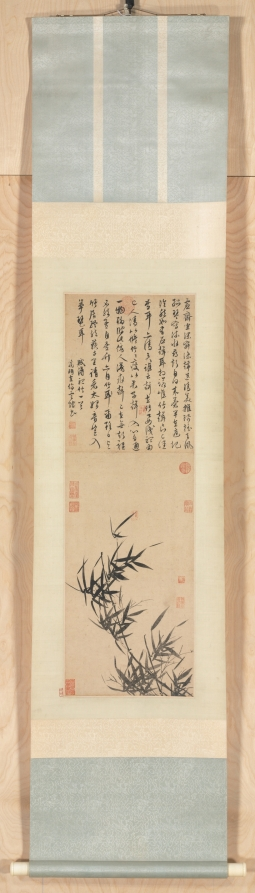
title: Listening to the Bamboo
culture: China, Ming dynasty (1368–1644)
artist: imitator of Wen Zhengming (Chinese, 1470–1559)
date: late 1400s-1500s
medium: hanging scroll, ink on sutra paper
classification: Painting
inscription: Artist's inscription, signature, and 2 seals on the separate sheet of paper above the painting: In the empty studio sitting in deep loneliness;/ Like cool sound sending pure beauty,/ Or pendants swinging in the wind,/ Or a solitary qin suggesting running water./ Where is that sound from?/ The green poles in the courtyard,/ Clear and light like an echo,/ The sound and ears are in tune./ The sound of bamboo now very beautiful;/ My ears are also clear./ Who says the sound is in the bamboo?/ To know it depends on oneself./ A noble person is like a tall bamboo;/ A thin bamboo is like the noble man./ When the sound enters, the mind responds,/ Only one thing but artificially separated./ A bystander searching for the sound,/ But the sound can only be found in silence./ Otherwise I am still I,/ Bamboo is still bamboo./ Even if I live with bamboo every day,/ Still the music will be a thousand miles away./ Look at sound's most primeval source:/ Did it enter a zither or a lute? Composing a poem on Listening to the Bamboo. Written by Zhengming at the Ting yun guan. Wen Zhengming [2 seals] Wen Zhengming yin 文徵明印; Wei geng yin wu yi jiang 惟庚寅吾以降.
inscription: [印] 文徵明印; 惟庚寅吾以降.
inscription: 5 seals of the Qianlong emperor (r. 1736-95)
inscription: [印] 金粟山藏經紙